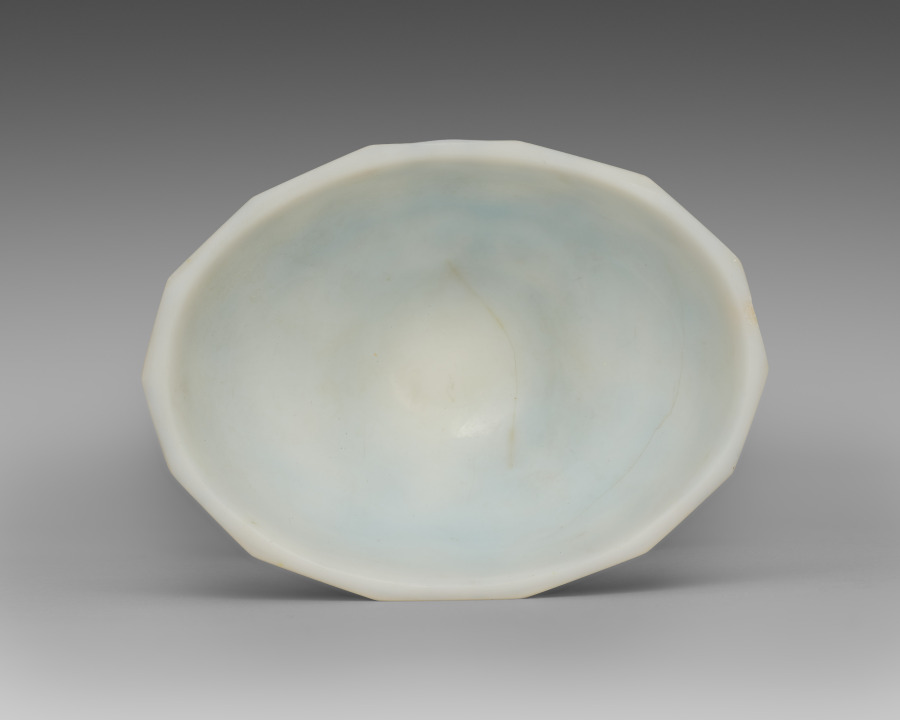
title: Cup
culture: Bohemia, 18th century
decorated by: Ignaz Preissler (Bohemian, 1676–1741)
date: c. 1735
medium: Opal glass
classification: Glass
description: This cup may have functioned as a vessel for an alcoholic beverage or as a container for food such as candies or pastries. Ignaz Preissler’s specialty was a technique known as Schwarzlot (“black lead” in German), in which a design was painted with black enamel and then fine details were scratched out with a needle. Preissler’s clients were primarily aristocrats who commissioned vessels as gifts or commemorative items and for whom the chinoiseriedecoration (imaginary European interpretations of Asian cultures), seen here, was fashionable.